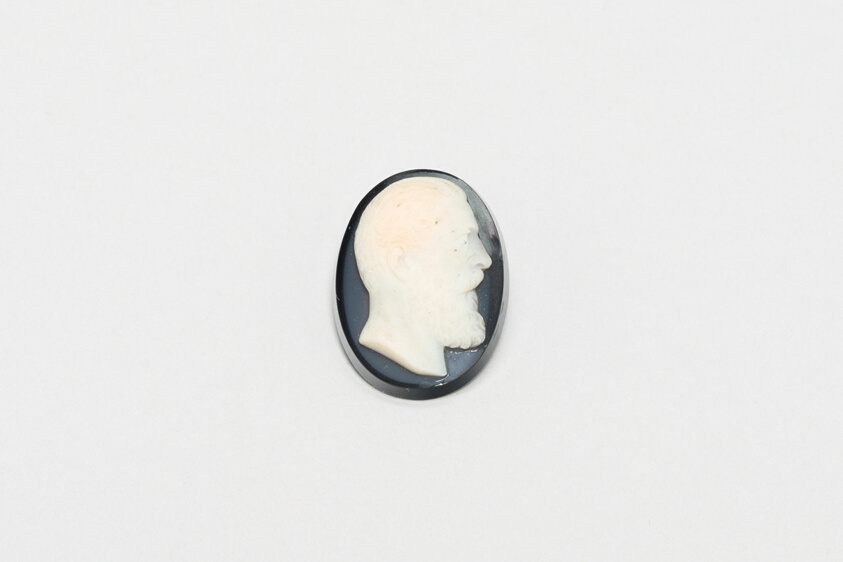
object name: Metalwork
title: Cameo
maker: France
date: c. 1870/80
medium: Stone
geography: France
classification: jewelry; cameo (sculpture); european decorative arts; metalwork